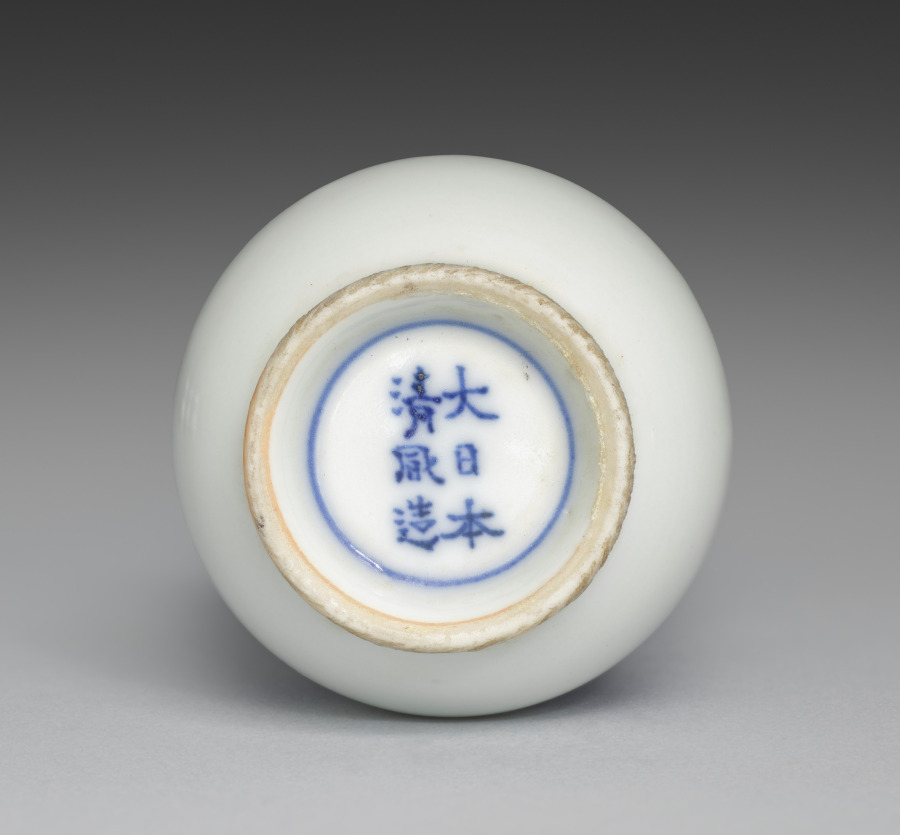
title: Cup from Sake Cups with Dragons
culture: Japan, Meiji period (1868–1912)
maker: Seifū Yohei III (Japanese, 1851–1914)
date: c. 1893–1914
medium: One from a set of six sake cups; porcelain with underglaze blue and iron oxide rims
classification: Ceramic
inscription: 大日本清風造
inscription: 清風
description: Each of these sake cups pictures two backward-looking dragons. The highly stylized creatures resemble jade carvings.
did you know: Seifū Yohei III was inspired by the Chinese mythical animals that were common on porcelain objects made at Jingdezhen in China during the Ming dynasty (1368–1644) and then exported around the world.